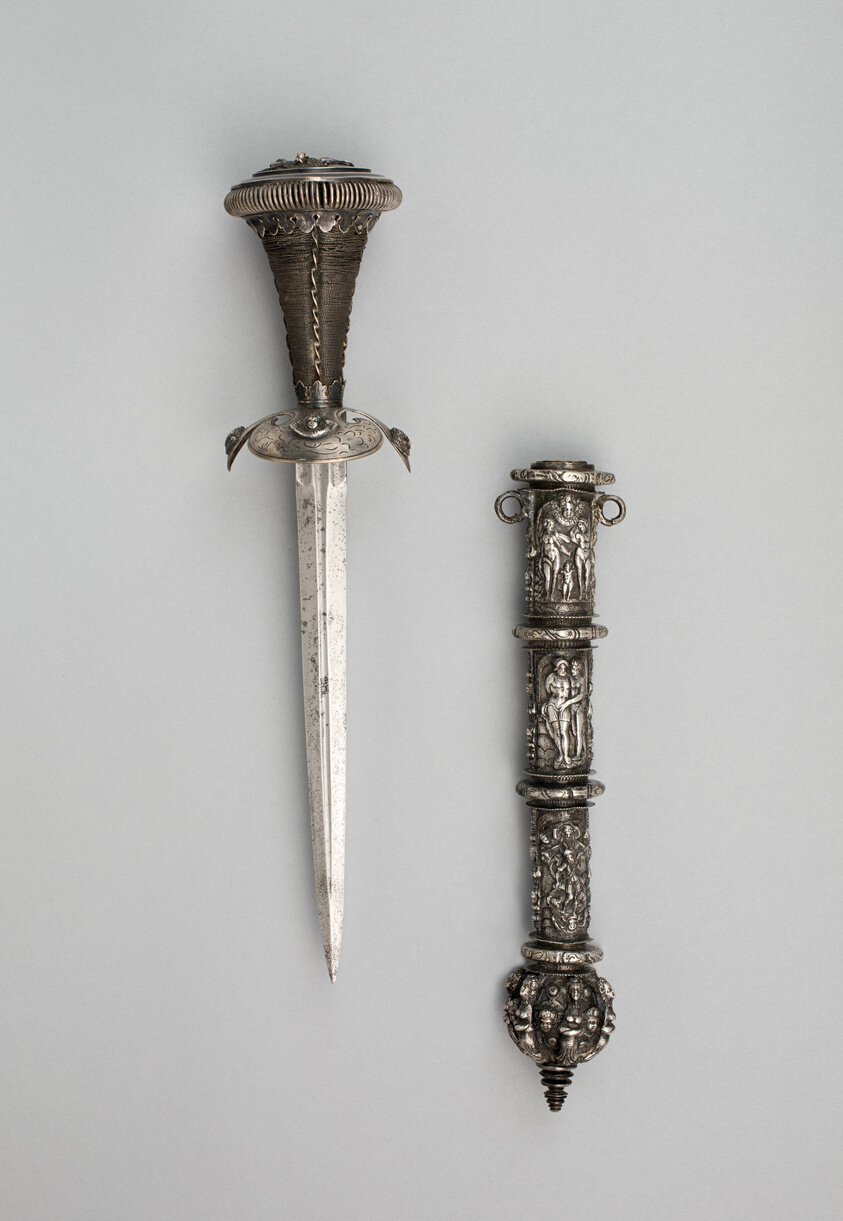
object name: Arms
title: Dagger and Sheath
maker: German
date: Scabbard: third quarter of 16th century; dagger: 19th century in 16th century style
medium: Steel, silver, and wood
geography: Germany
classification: edged weapon-dagger; arms; arms and armor